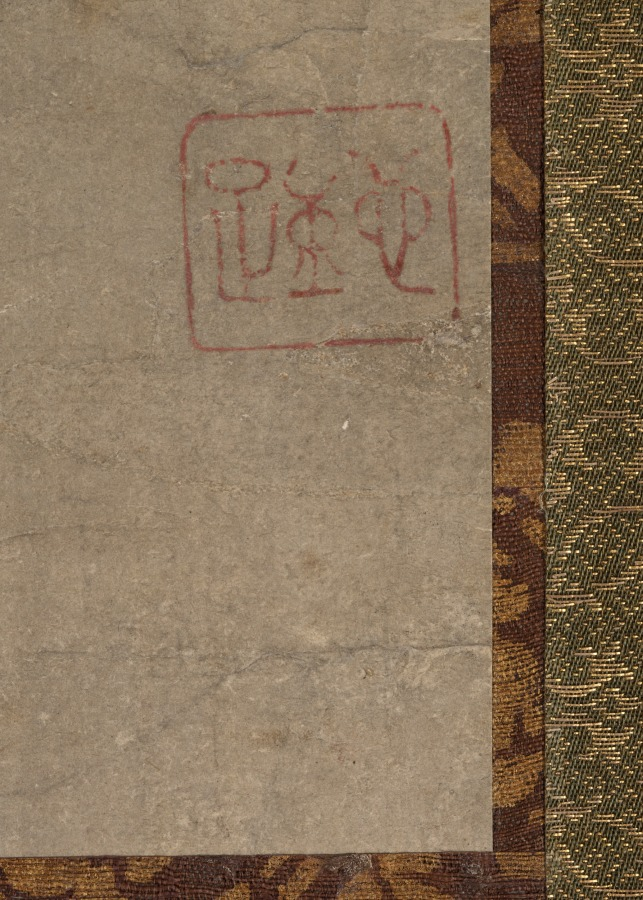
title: Landscape with a Pavilion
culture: Japan, Edo period (1615–1868)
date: c. 1700–1868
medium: hanging scroll; ink on paper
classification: Painting